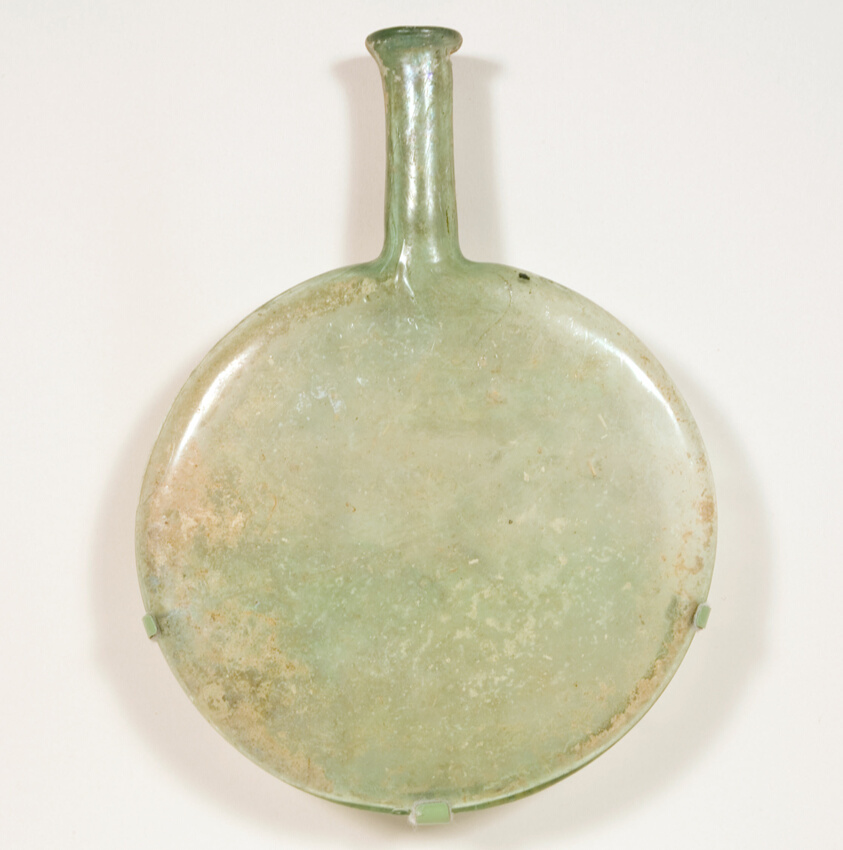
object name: Vessel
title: Flat Flask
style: byzantine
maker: Byzantine; Eastern Mediterranean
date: 5th-6th century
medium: Glass, blown technique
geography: Byzantine Empire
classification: vessel; glass; ancient art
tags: containers